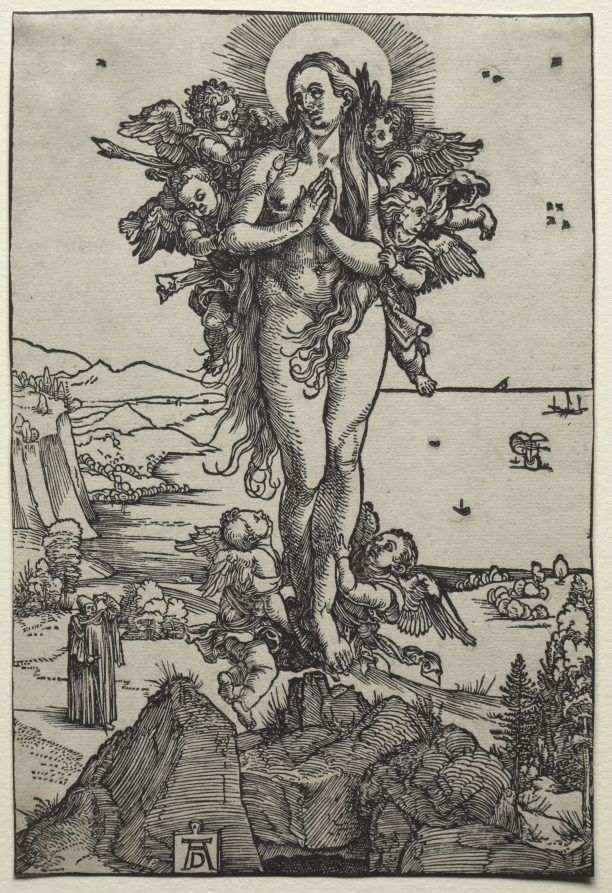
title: The Ecstasy of Mary Magdalene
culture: England, early 16th Century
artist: Albrecht Dürer (German, 1471–1528)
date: 1501–4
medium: woodcut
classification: Print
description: Dürer’s woodcut of Mary Magdalene represents a popular subject in German art and is considered a schlechtes Holzwerk, a simple woodcut intended for a general audience. According to a medieval book of saints’ lives known as the Golden Legend, Mary Magdalene spent the last 30 years of her life as a hermit outside of Marseilles, France, where she was miraculously borne aloft to heaven seven times a day to hear the choir of angels. Considered a fallen woman in her early life, Mary earned redemption through her complete devotion to Christ. During this period, Dürer was preoccupied with the laws of human proportion and the female figure. Mary Magdalene’s powerful legs and widened hips are comparable to the female nudes in Dürer’s The Dream of the Doctor and Adam and Eve.